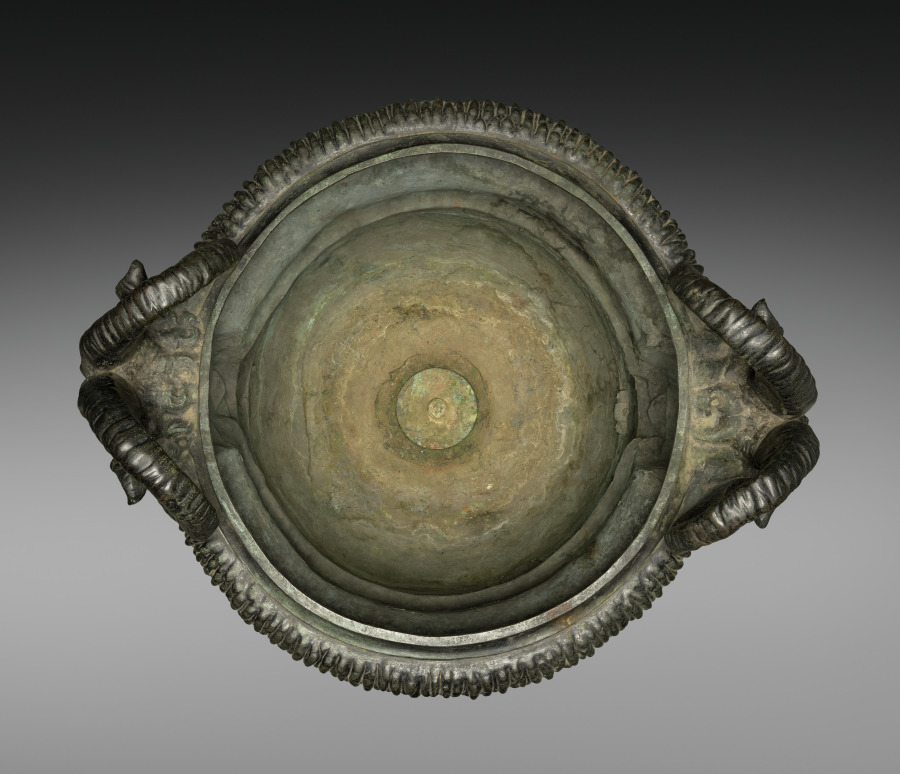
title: Urn with Satyr Heads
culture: France, 18th century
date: 1700s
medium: bronze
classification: Metalwork